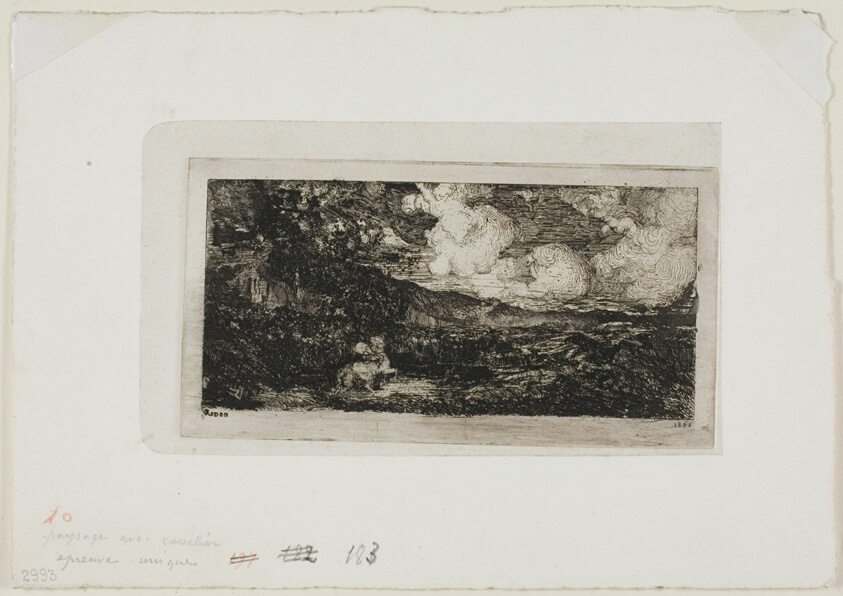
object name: Print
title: Galloping Horseman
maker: Odilon Redon (French, 1840-1916)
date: 1866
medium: Etching on light gray China paper laid down on ivory wove paper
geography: France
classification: etching; print; prints and drawing; paper